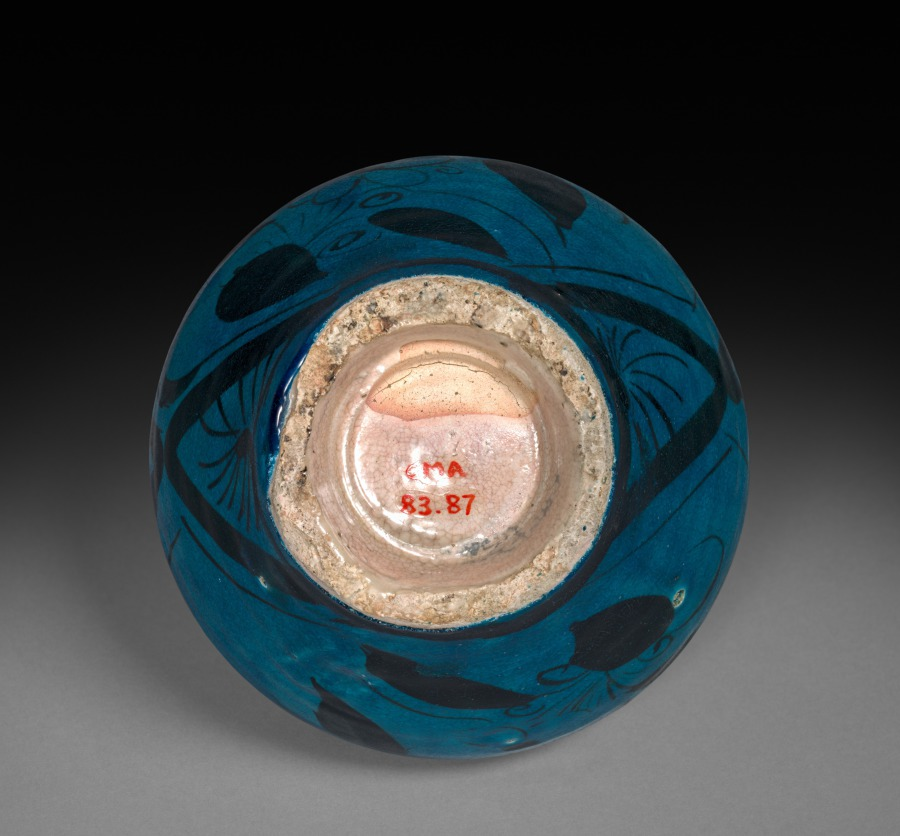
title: Jar: Cizhou ware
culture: China, Yuan dynasty (1271-1368)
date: 1271–1368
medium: stoneware with slip coating, turquoise glaze and painted underglaze decoration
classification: Ceramic